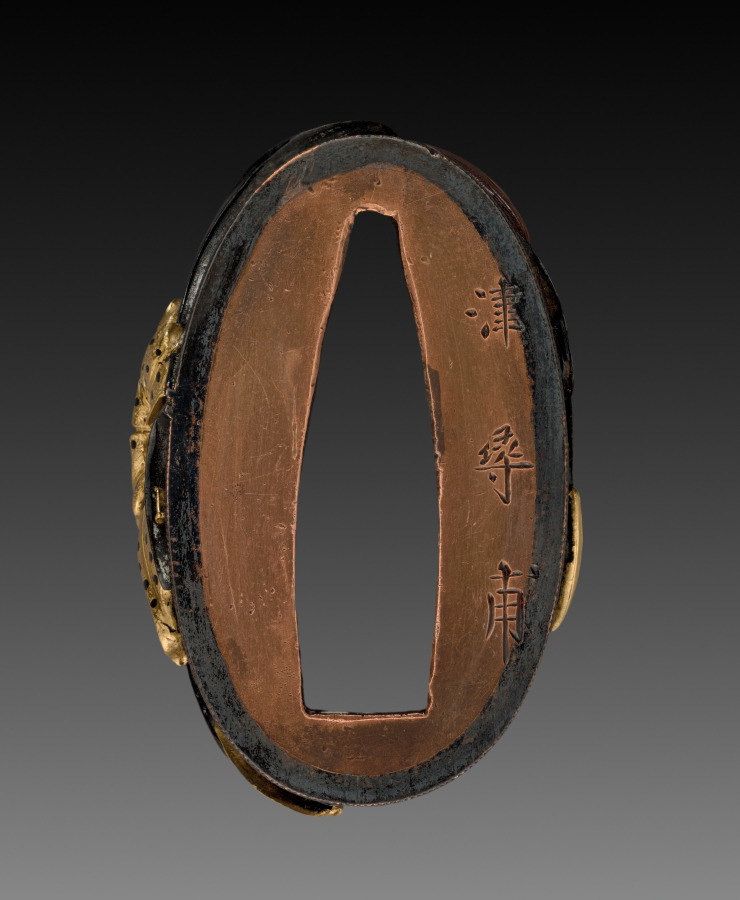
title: Sword-Hilt Collar (Fuchi)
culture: Japan, Edo period (1615–1868)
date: 1700–1850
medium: shakudo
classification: Arms and Armor